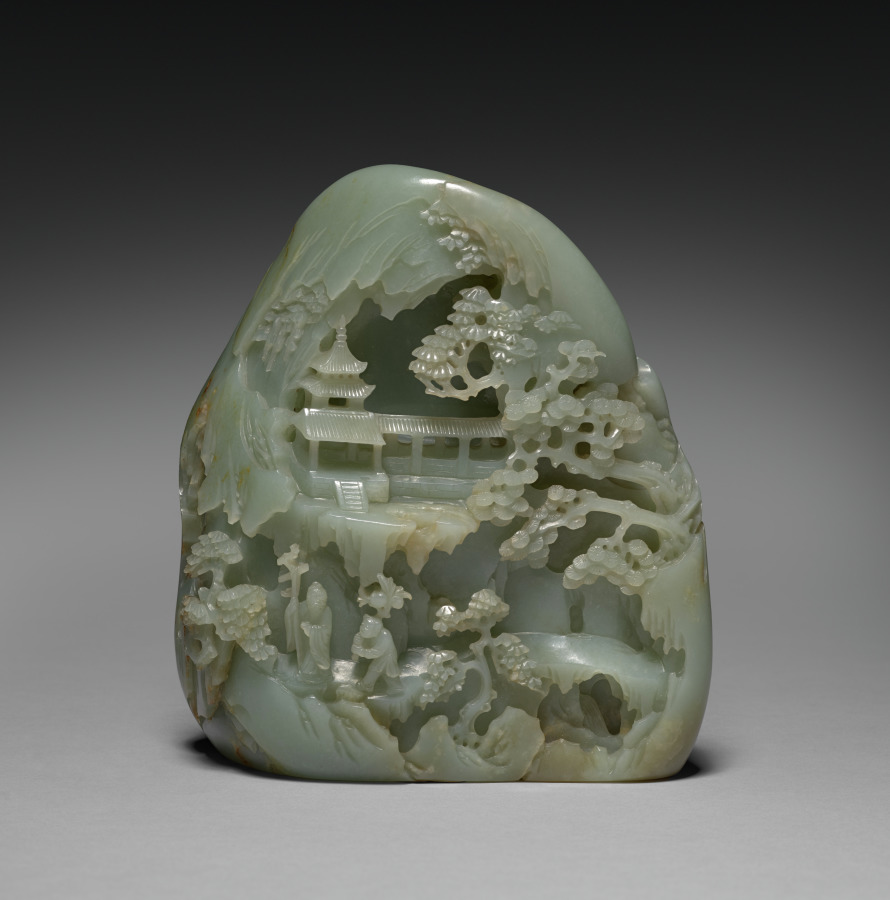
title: Miniature Mountain with Daoist Paradise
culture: China, Qing dynasty (1644–1911), Qianlong reign (1736–95)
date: 1736–95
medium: green jade with brown markings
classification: Jade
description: Sizable jade boulders of mountainous landscapes were carved to represent the search for the paradise or immortals' dwellings in the mountains. This Daoist theme has fired the Chinese imagination throughout history. Believed to have spiritual and magical properties, jade has long been used in tombs and intended for preserving the corporeal body and the soul in the quest for eternity. It is recorded that Daoist practitioners drank morning dews with scraps of jade as an elixir of immortality.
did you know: The bearded immortal is accompanied by a servant carrying a cluster of peaches, symbols of immortality.